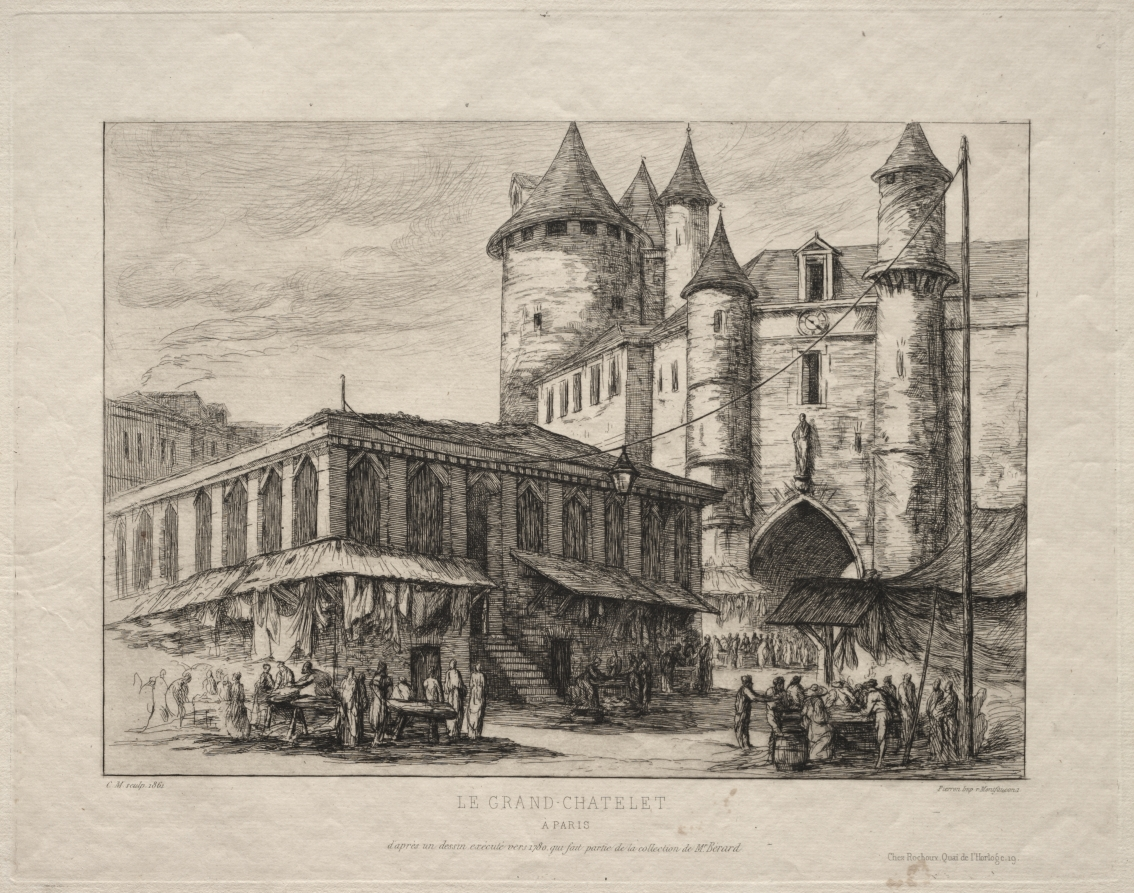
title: The Grand Châtelet, Paris, about 1780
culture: France, 19th century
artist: Charles Meryon (French, 1821–1868)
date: 1861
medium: etching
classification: Print